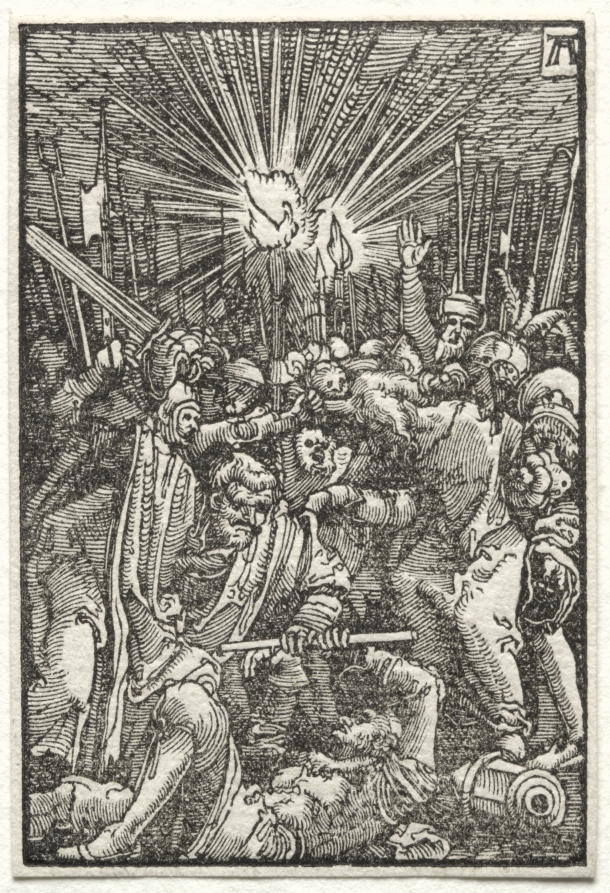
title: The Fall and Redemption of Man: Christ taken captive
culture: Germany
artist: Albrecht Altdorfer (German, c. 1480–1538)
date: c. 1515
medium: woodcut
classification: Print